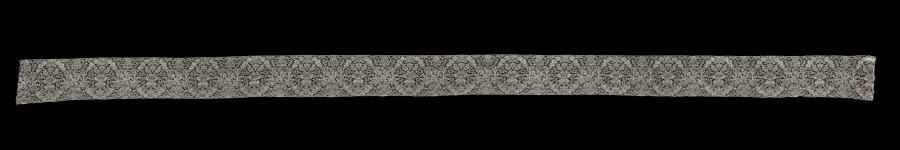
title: Lace Edging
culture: Belgium, Binche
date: 1700s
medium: Linen: bobbin lace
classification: Lace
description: The design of this piece of lace is similar to three other pieces of lace in the CMA's collection—1945.87–89.